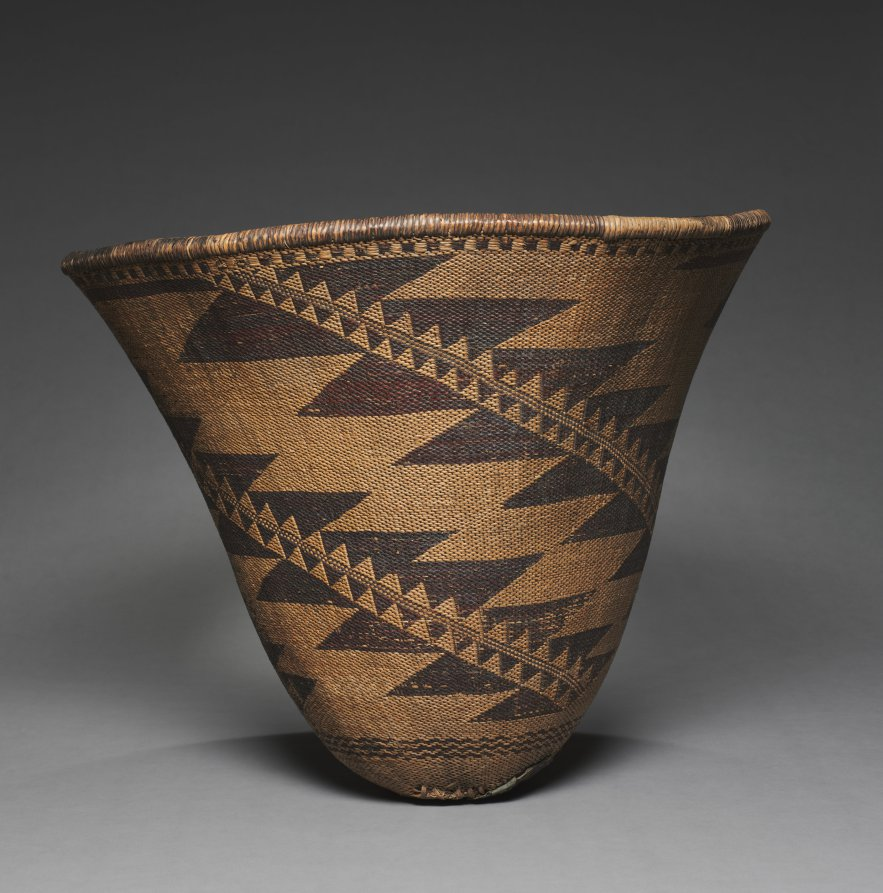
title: Burden Basket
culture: California, Pomo, central, late 19th century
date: 1880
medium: redbud, sedge; diagonal twine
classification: Basketry